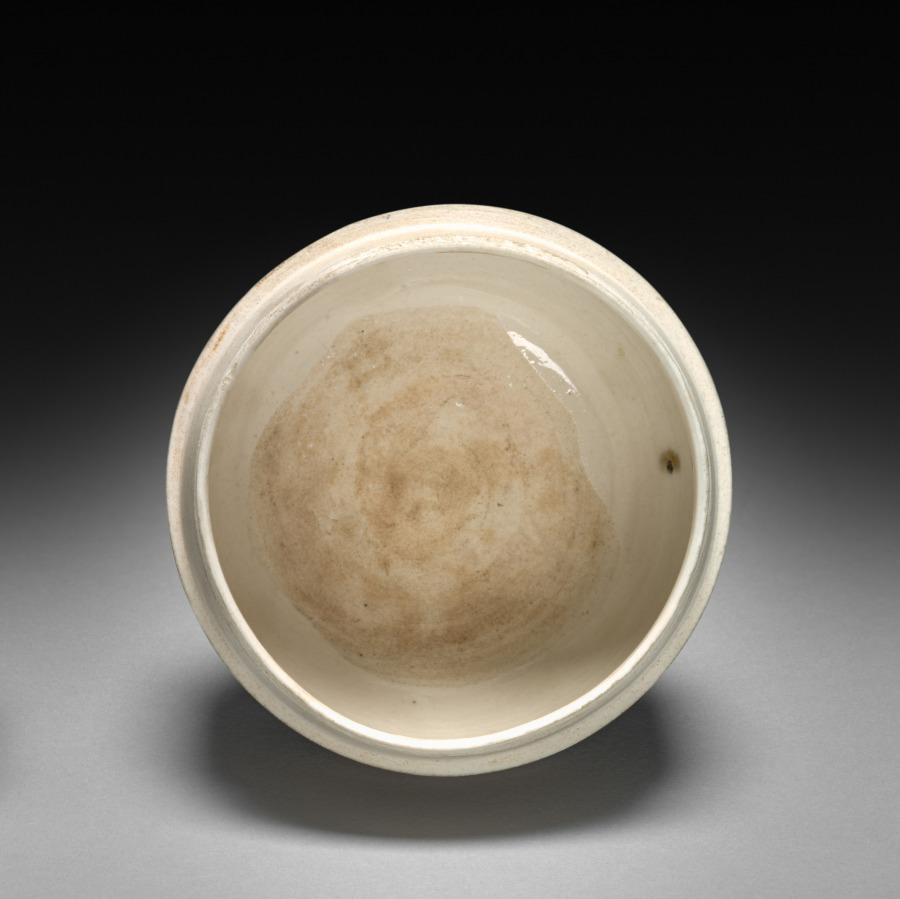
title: Covered Box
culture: China, Hebei province, Quyang, Northern Song dynasty (960–1127)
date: 1000s–1100s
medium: white porcelain, Ding ware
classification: Ceramic